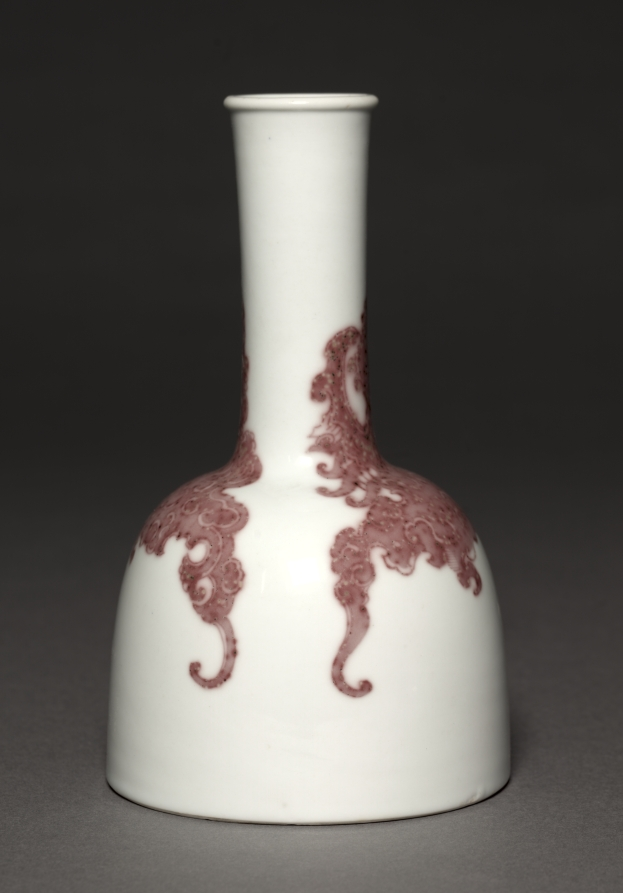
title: Mallet-Shaped Bottle with Phoenixes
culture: China, Jiangxi province, Jingdezhen, Qing dynasty (1644-1911), Kangxi mark and period (1662-1722)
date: 1662–1722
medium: porcelain with underglaze red (and green) decoration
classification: Ceramic